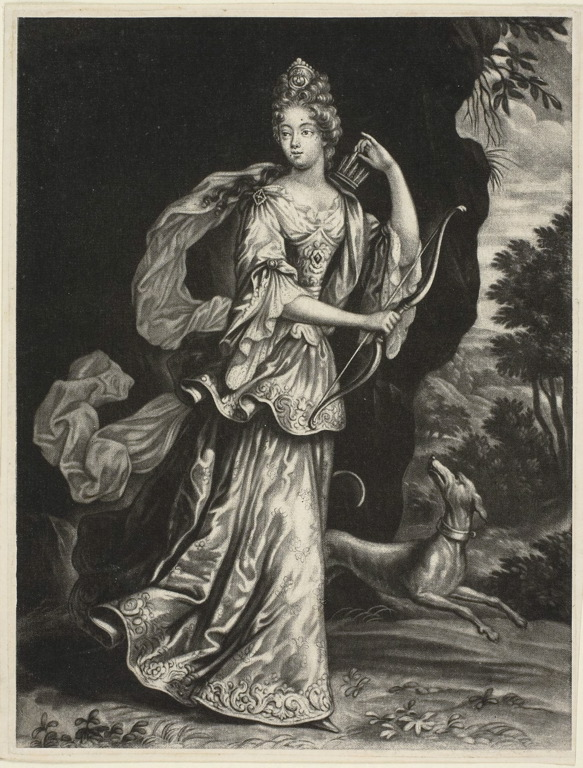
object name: Print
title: Anne Catharine Mouy, Countess of Broglia, as the Goddess Diana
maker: Pieter Schenk (Dutch, 1660-1711)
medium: Mezzotint on paper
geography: Netherlands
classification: mezzotint; print; prints and drawing